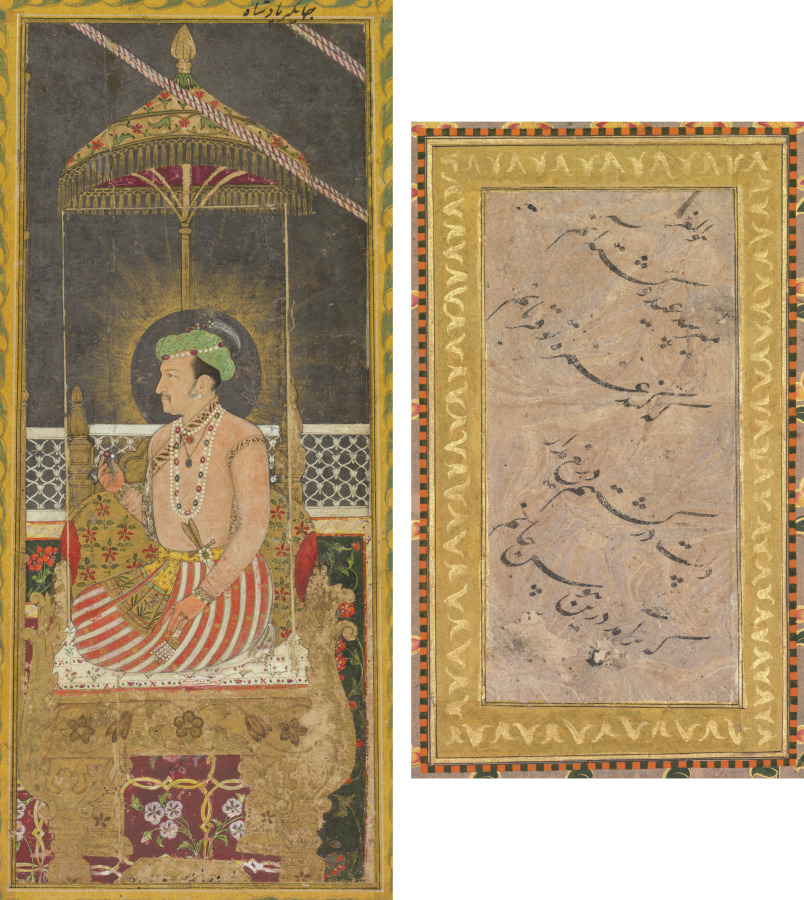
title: Posthumous portrait of Emperor Jahangir under a canopy (recto); Calligraphy (verso)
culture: India, Mughal, 17th century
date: c. 1650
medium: Gum tempera, ink, and gold on paper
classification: Painting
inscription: recto: Persian inscription above, in inner border, in nasta‘liq script: Great King Jahangir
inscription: verso: Persian verse in nasta‘liq script: The Feast is approaching, and I am dying for/ Your coquetry to make a sacrifice of me./ Do not hold back from killing me:/ For that very wish I have given up my soul.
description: Jahangir, the fourth Mughal emperor, was remembered for his greatness long after his death. Ruling from 1605 to 1627, he laid the foundations for long-term trade and diplomatic relations with various nations of Europe, most notably England and Portugal. He oversaw the transition of Mughal India into a global power during a time that can be considered the international Age of Exploration. This posthumous portrait depicts Jahangir amid the trappings of wealth and power with the light of divine sanction shining behind his head. A white marble railing demarcates his imperial space.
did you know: Jahangir holds a ruby or spinel, thought to be a talisman for military victory.